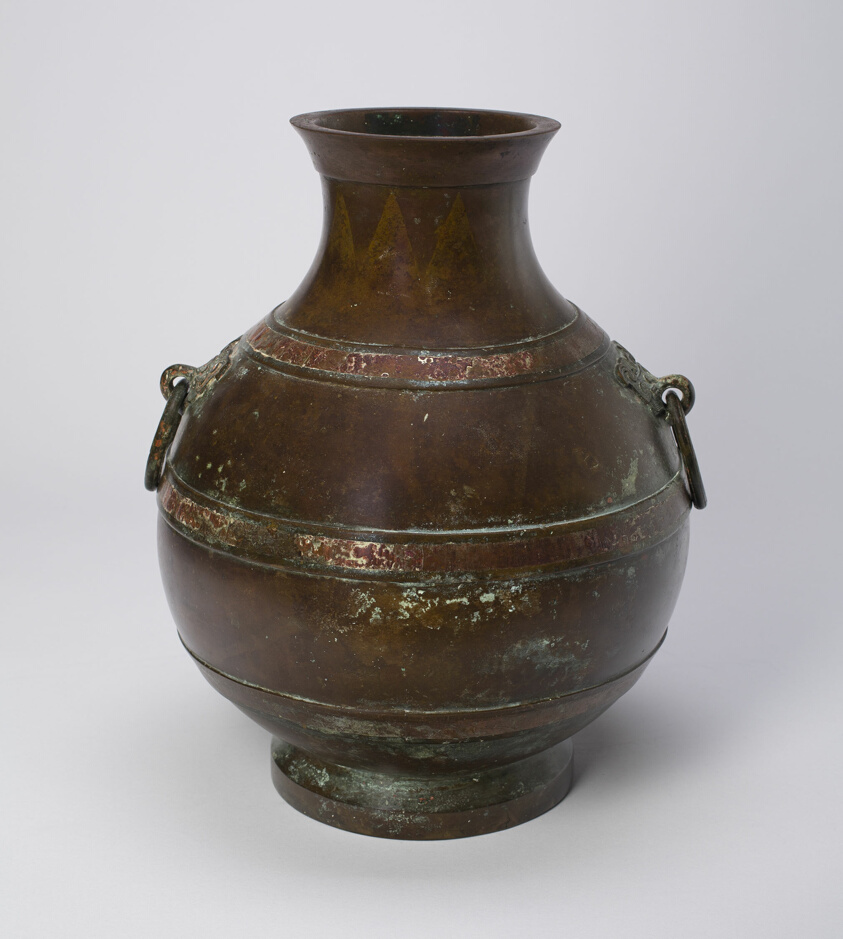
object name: Vessel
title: Wine Jar (Hu)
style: Chinese (culture or style)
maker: China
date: Eastern Zhou dynasty, Warring States period or Western Han dynasty, 3rd/2nd century B.C.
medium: Bronze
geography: China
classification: bronze; metal; vessel; asian art